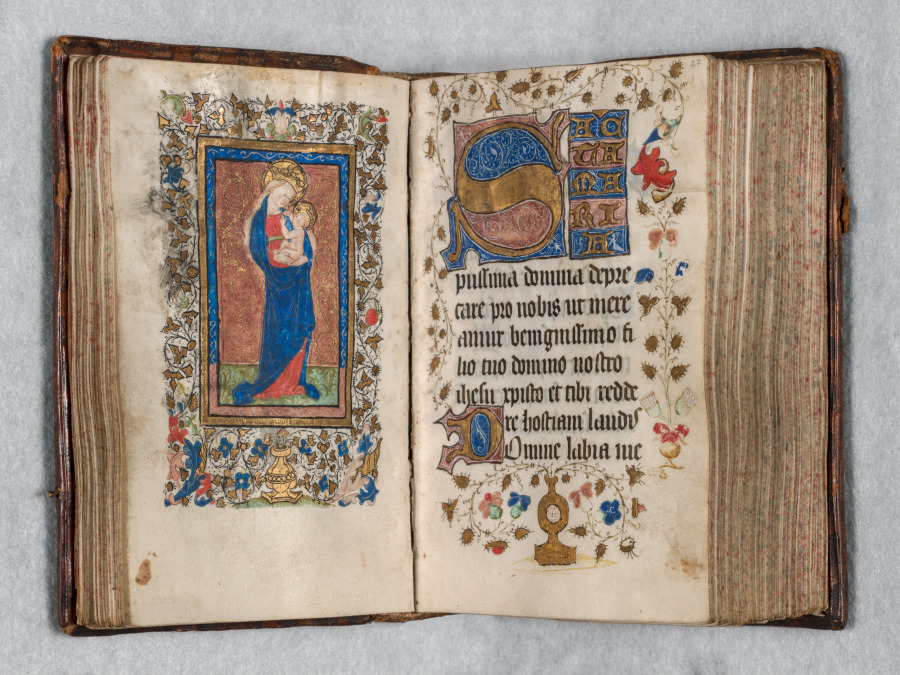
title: Book of Hours (Use of Metz): Fol. 26v, Virgin and Child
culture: France, Metz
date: c. 1440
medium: ink, tempera, and gold on vellum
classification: Bound Volume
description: This volume contains only one full-page miniature (opened here) of the Standing Virgin with Child. It introduces the prayer: "Holy Mary, faultless Lady, intercede for us..." The first seven folios of the book list dedications of Metz churches and indulgences which are unique to that diocese. The city of Metz, situated on the Moselle River, was the cultural and commercial capital of Lorraine during the 1400s. It was also the location of an important bishopric (diocese of a bishop) and, therefore, the center of a growing book trade.